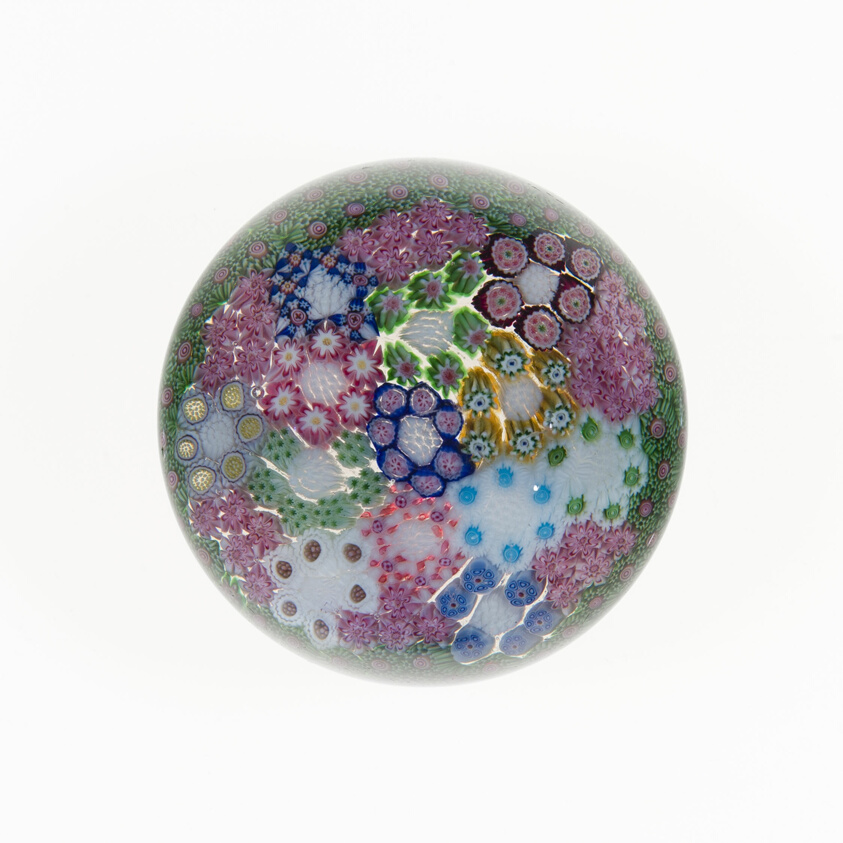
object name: Glass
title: Paperweight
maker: Clichy Glassworks (Cristalleries de Clichy); Clichy, France, 1837-1885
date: c. 1845/60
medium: Glass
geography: Clichy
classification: paperweight; glass